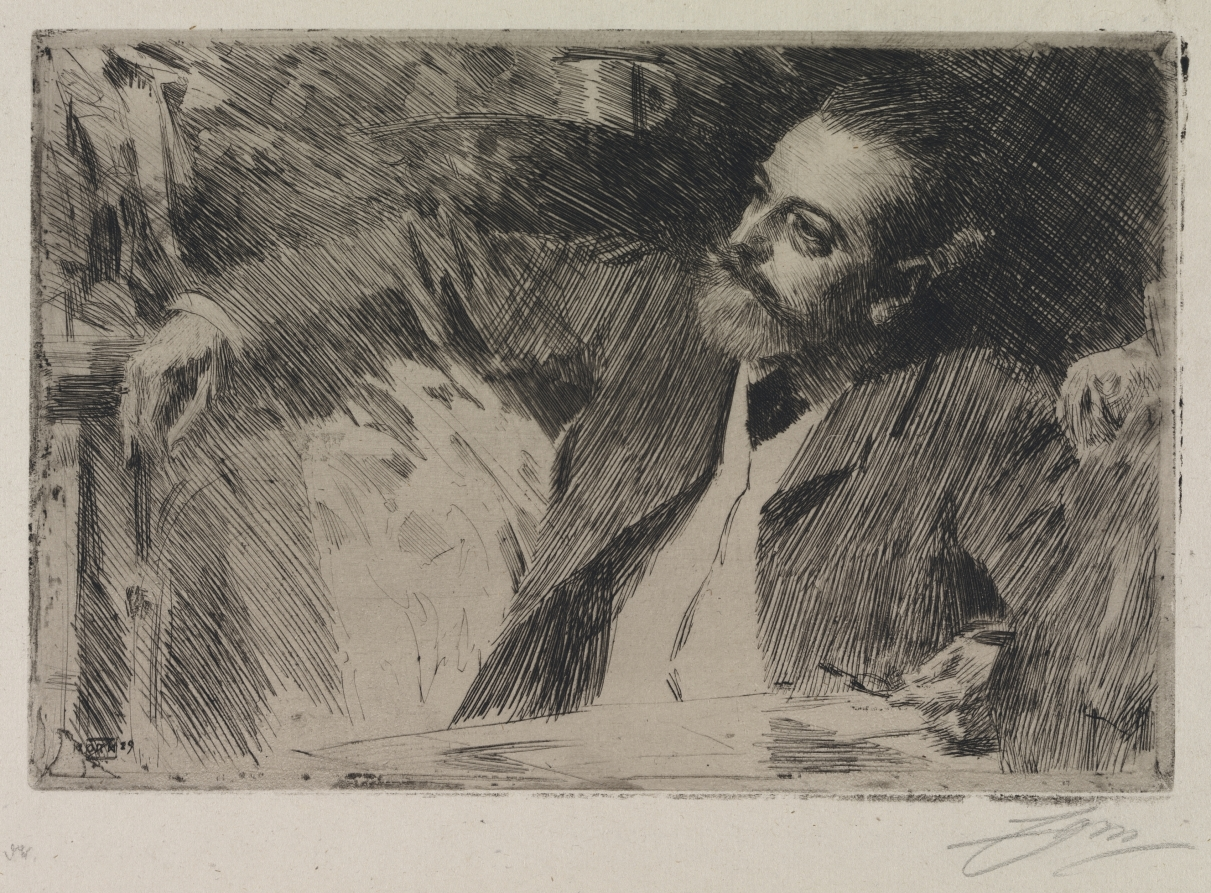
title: Antonin Proust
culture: Sweden, 19th century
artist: Anders Zorn (Swedish, 1860–1920)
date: 1889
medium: etching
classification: Print